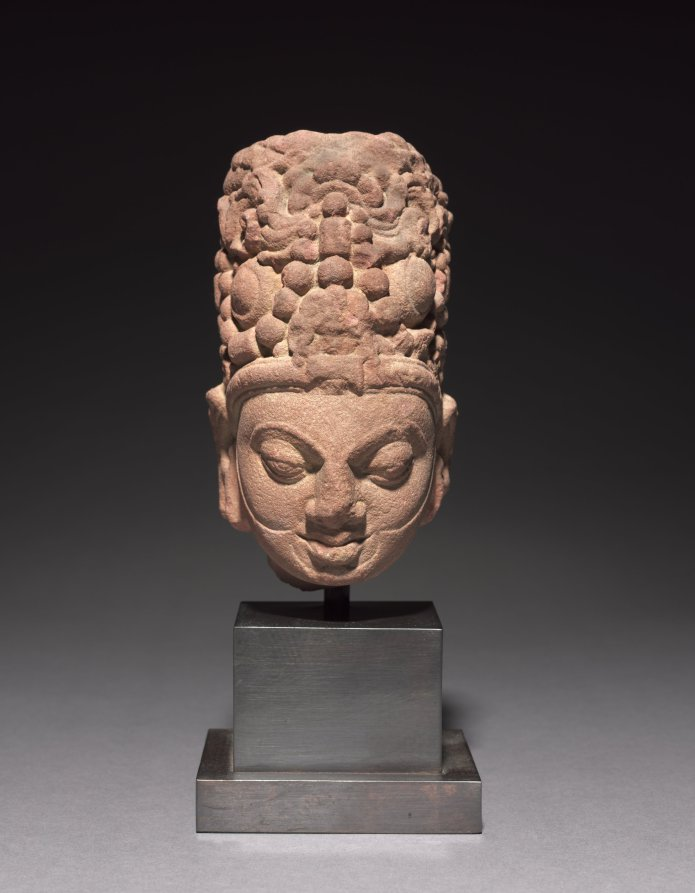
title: Head of Surya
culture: India, Mathura, Post-Gupta period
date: c. 500s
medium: spotted red sandstone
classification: Sculpture